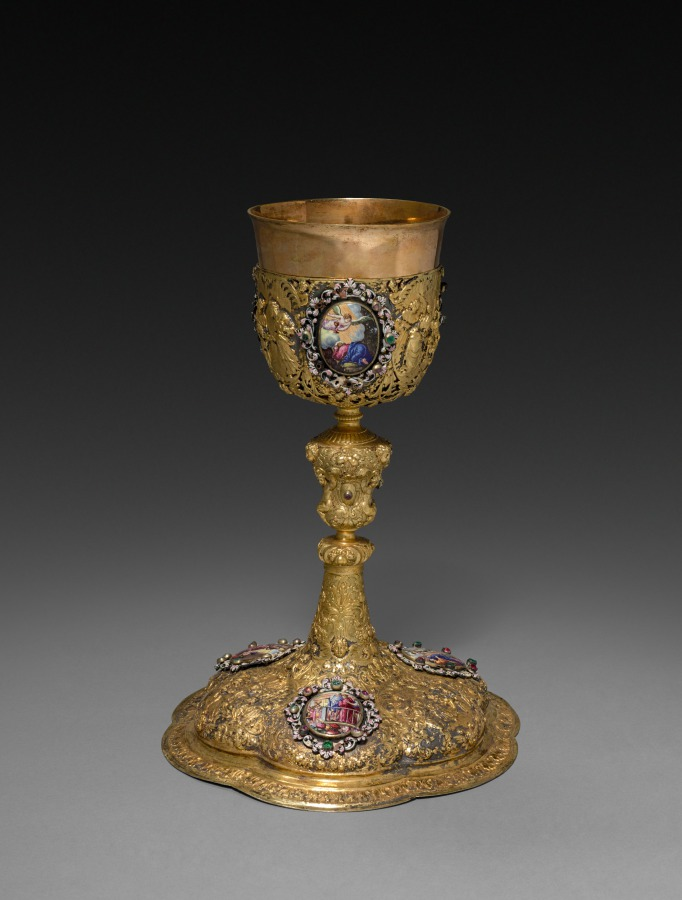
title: Chalice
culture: Switzerland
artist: Thomas Pröll (Swiss)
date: early 1700s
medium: silver gilt with polychrome painted enamels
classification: Metalwork